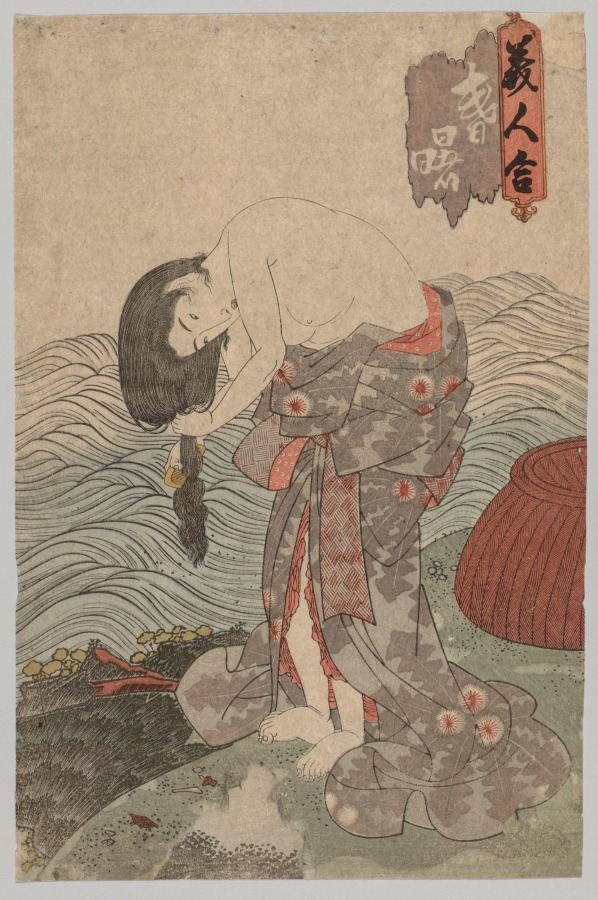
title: Woman Diver Combing her Hair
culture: Japan, Edo period (1615–1868)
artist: Utagawa Kunisada (Japanese, 1786–1865)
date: 1786–1864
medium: color woodblock print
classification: Print